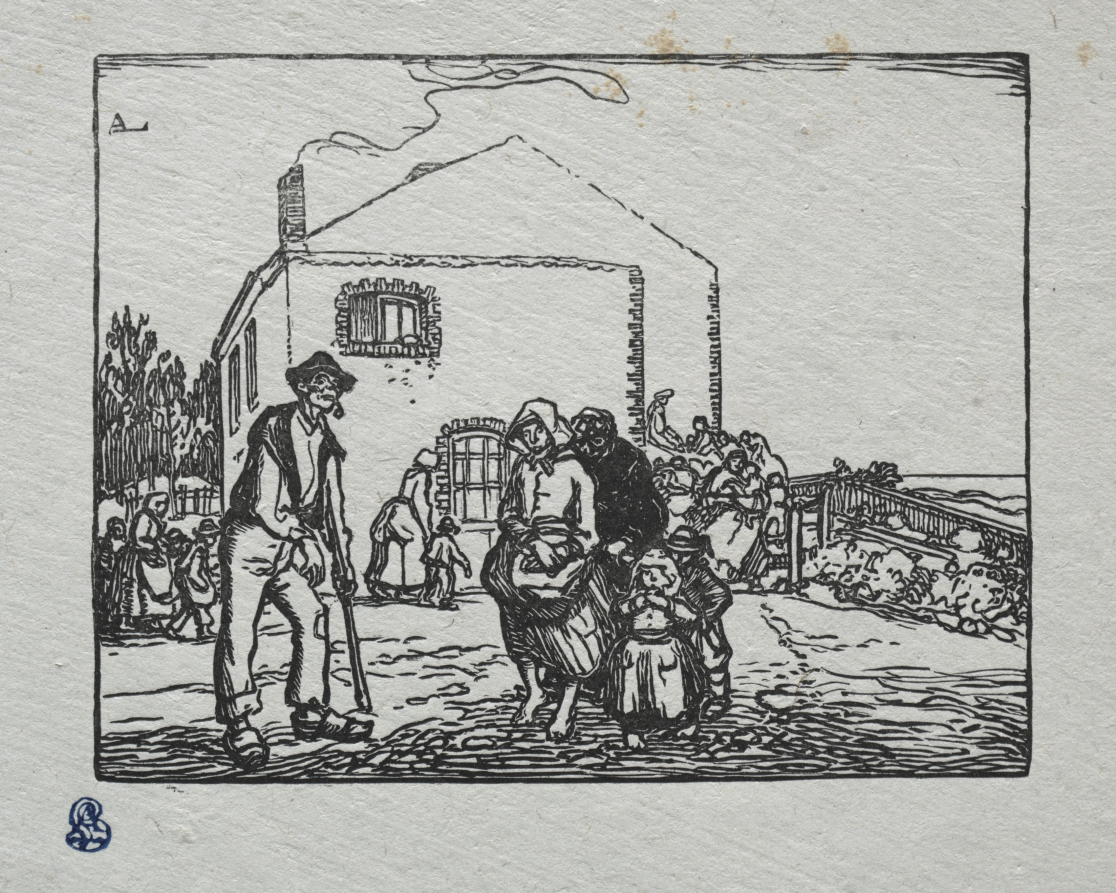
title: The Beggars at the Last House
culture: France, late 19th-early 20th Century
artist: Auguste Louis Lepère (French, 1849–1918)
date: 1905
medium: woodcut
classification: Print